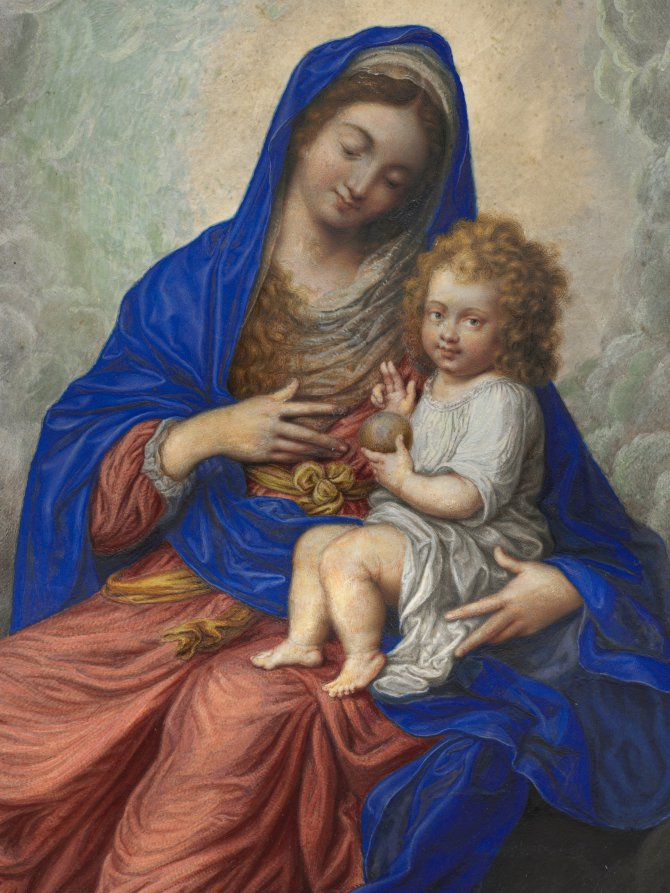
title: Madonna and Child in Glory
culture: England, 17th century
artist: Isaac Oliver (French, c. 1565–1617)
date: c. 1605–1617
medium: gouache and watercolor, heightened with gum arabic, with shell gold framing lines, on vellum, mounted on paper, vellum, and wood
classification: Portrait Miniature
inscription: signed with monogram in gold, lower right: "IO"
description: It is difficult to overstate the singularity of this work in 17th-century England. While the image has visual sources in works by Rubens and Federico Barocci, surely known to the cosmopolitan artist (who travelled to Italy, unusually for English artists at this moment), the object is iconographically unique. Oliver places a tender Virgin and Child (itself more closely linked to Catholic instead of Protestant imagery), in a heavenly, visionary setting, and incorporates the medieval iconography of the lactating Virgin with the Salvator Mundi, early Netherlandish in origin, but more commonly an Italian typology by the early seventeenth century.